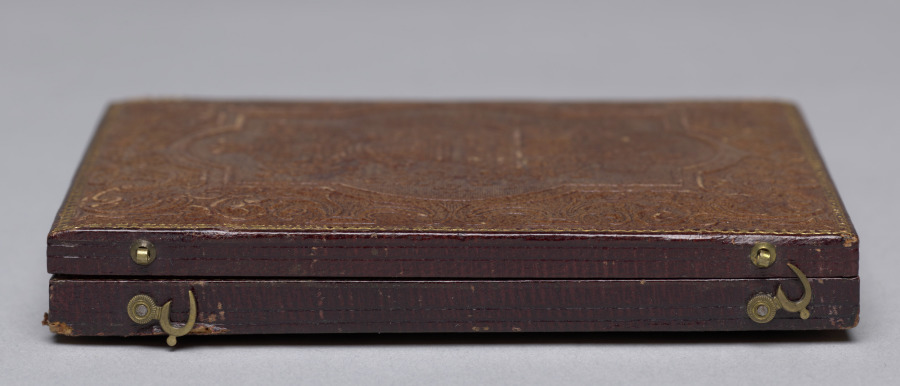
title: Cyrus B. Hills, Postmaster, Arlington, Vermont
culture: America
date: c. 1852–53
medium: daguerreotype, quarter plate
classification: Photograph